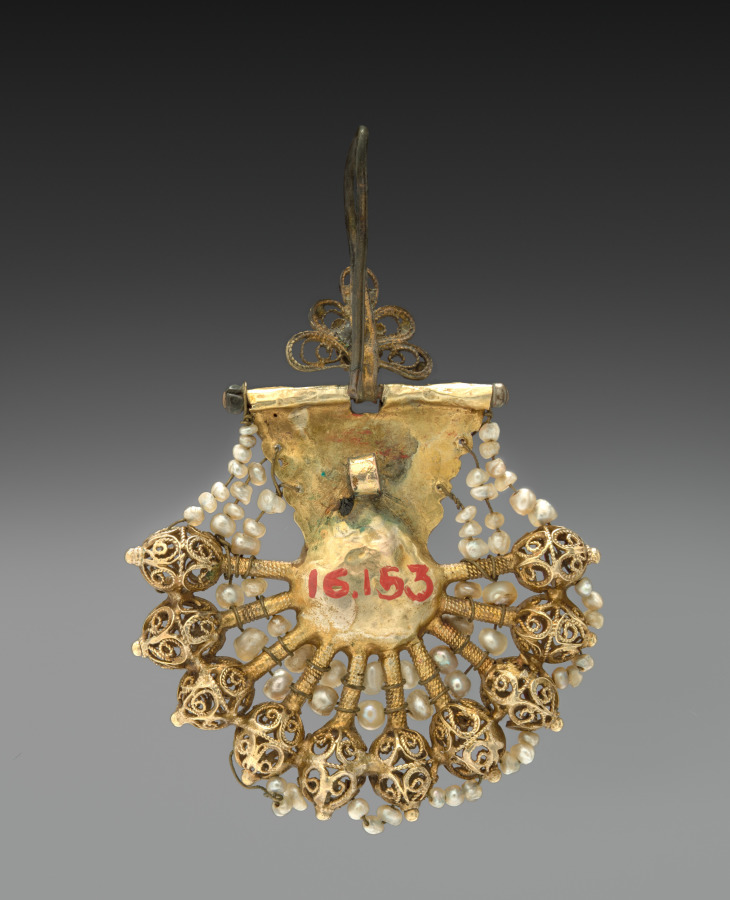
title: Earring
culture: Hungary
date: 1700s - 1800s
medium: silver gilt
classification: Jewelry